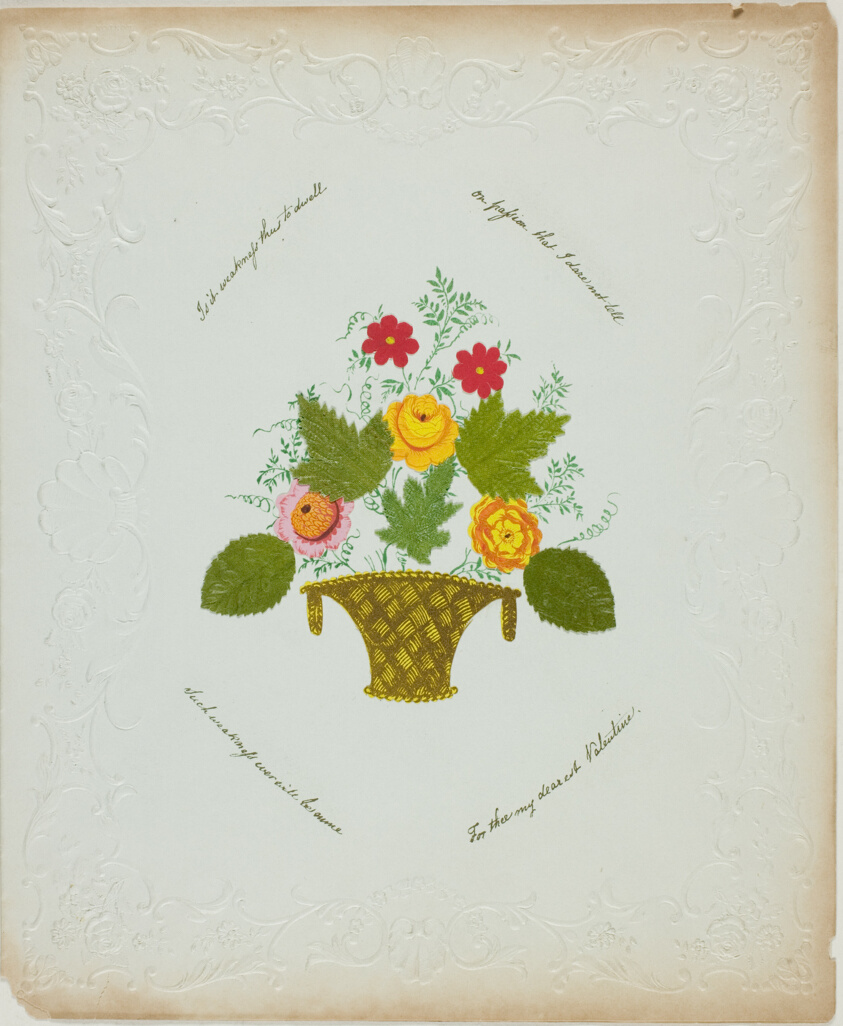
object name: Drawing and Watercolor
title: Is it Weakness thus to Dwell (valentine)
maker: George Kershaw (English, 19th century)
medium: Collaged elements on color lithograph on embossed off-white wove paper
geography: England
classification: valentine; prints and drawing; paper